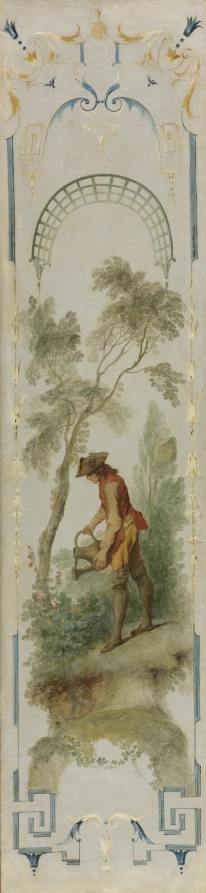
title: The Gardener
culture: France, 18th century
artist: Nicolas Lancret (French, 1690–1743)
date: c. 1723–27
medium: oil on canvas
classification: Painting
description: This whimsical series is one typically found in fashionable, elite Parisian residences of the eighteenth century. Panel paintings of this variety were created to decorated the space above chair rails and in between doors and windows, and Lancret's series was painted for a room in the Pavillon d'Hauteville in Paris. In keeping with the eighteenth-century French tradition of depicting the four seasons or the times of the day, Lancret's five decorative panels have a unifying theme. Pastoral activities and games, favored themes of Lancret, are the overarching motifs, and depict afternoon pastimes, set in nature. Three of the panels, The Swing, The See Saw, and The Vintage,depict lithe, youthful duets playfully engaging in the outdoor pleasures, while the narrower panels, The Gardener and Horticulture, host individual figures cultivating lush, private gardens. Despite the disparate subjects, stylistic details unify the series, including the delicate arabesques derived from nature that frame the scenes, and similar flora and fauna in each panel.